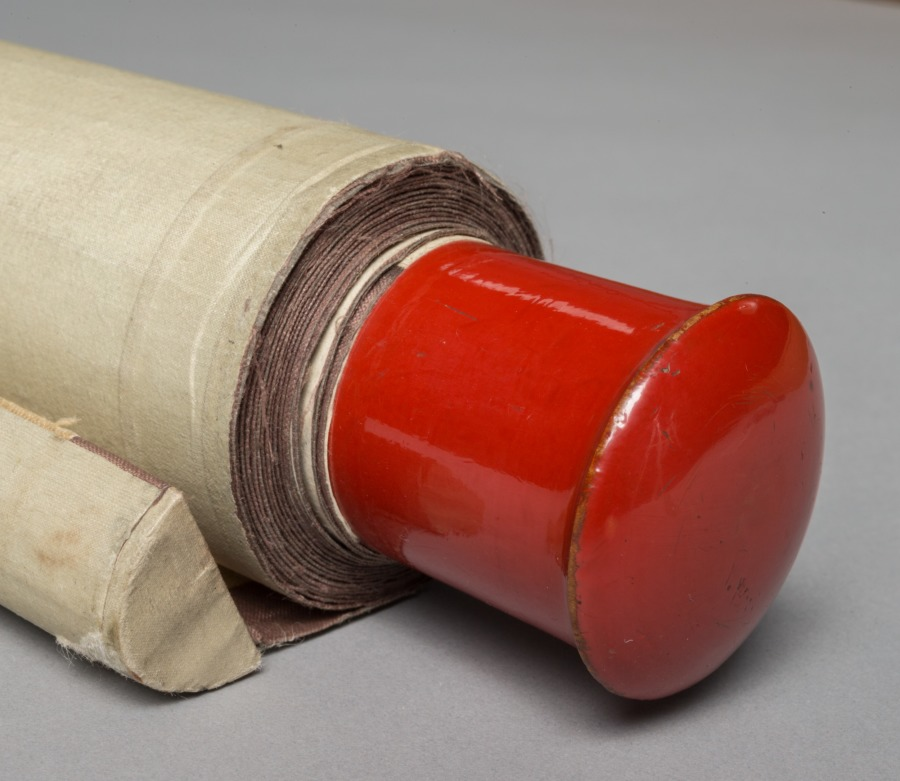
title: Monkeys by a Stream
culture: Japan, Edo period (1615–1868)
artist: Nagasawa Rosetsu (Japanese, 1754–1799)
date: c. 1796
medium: hanging scroll; ink and color on paper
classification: Painting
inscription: Inscription: 平安蘆雪寫意; Transliteration: Heian Rosetsu shai; Sealed: 魚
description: The two monkeys in this painting are Japanese macaques. The one in front dangles its left leg over a sharply angled rock, surveying the land beyond a fast-moving mountain stream. A smaller monkey sits behind it, looking directly ahead as if it realizes it is being watched. The artist used just a few highly contrasting warm and cool colors, sweeping brushstrokes over ink washes, and loose lines to create a scene that powerfully evokes the mentally engaged state of the two animals.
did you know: Monkeys, which are found throughout the mountainous and wooded areas of Japan, became a favorite subject of many later Japanese artists.